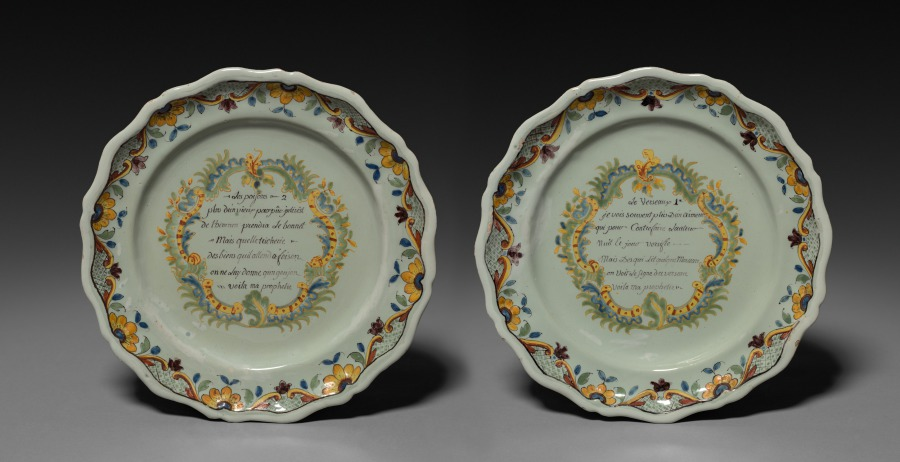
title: Pair of Plates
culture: France, Montauban(?), 18th century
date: c. 1780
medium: faience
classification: Ceramic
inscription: inscribed with French poen in the center.